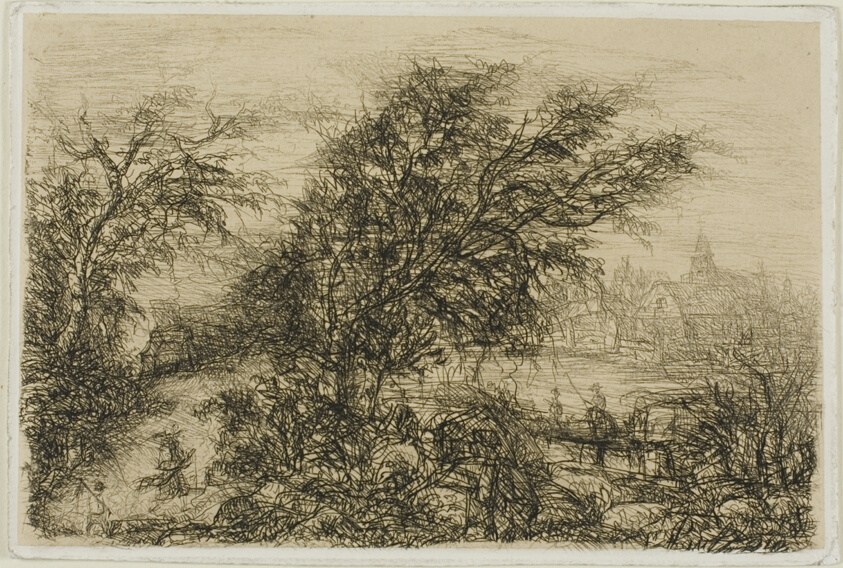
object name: Print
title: Trees Bending in the Wind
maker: Rodolphe Bresdin (French, 1825-1885)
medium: Etching on buff China paper laid down on white wove paper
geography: France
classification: etching; print; prints and drawing